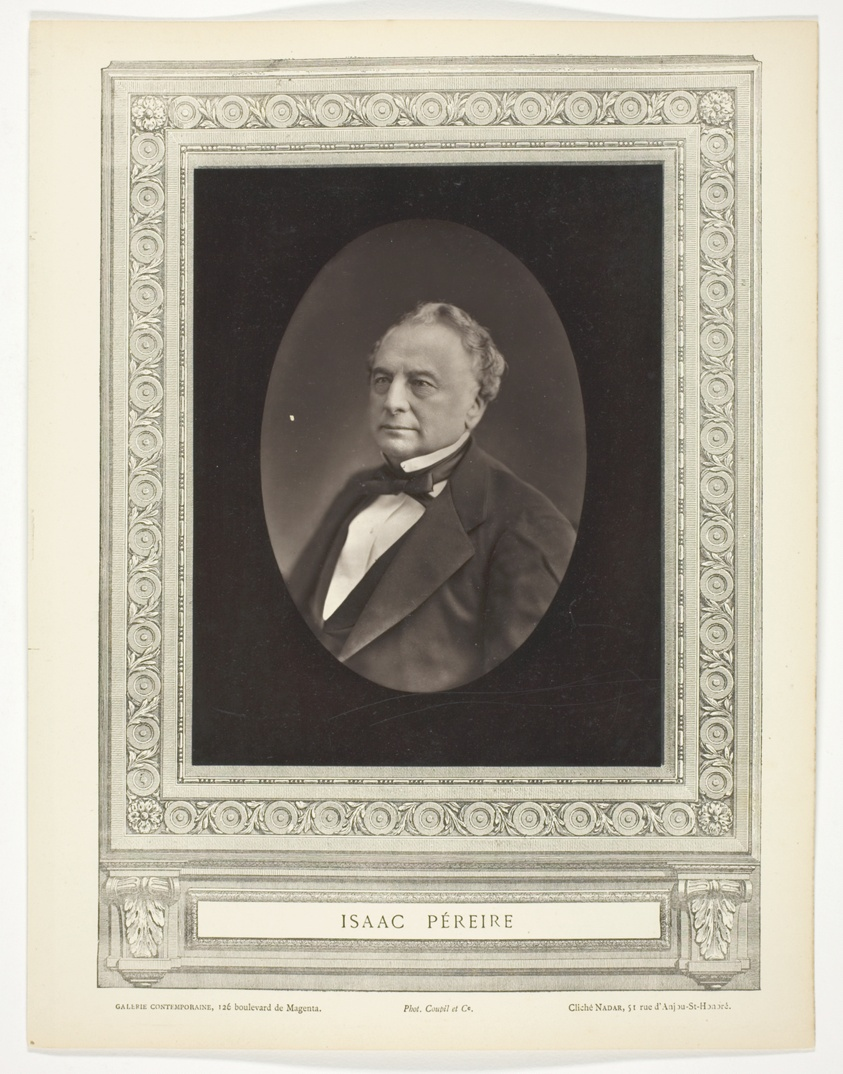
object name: Photograph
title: Isaac Péreire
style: 19th century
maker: Nadar (Gaspard Félix Tournachon) (French, 1820–1910)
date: c. 1853/76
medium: Woodburytype, from the periodical “Galerie Contemporaine Littéraire, Artistique” (1876), volume 3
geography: France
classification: woodburytype; photomechanical process; photography; photograph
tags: Collected by Hugh Edwards, Contemporaine Littéraire